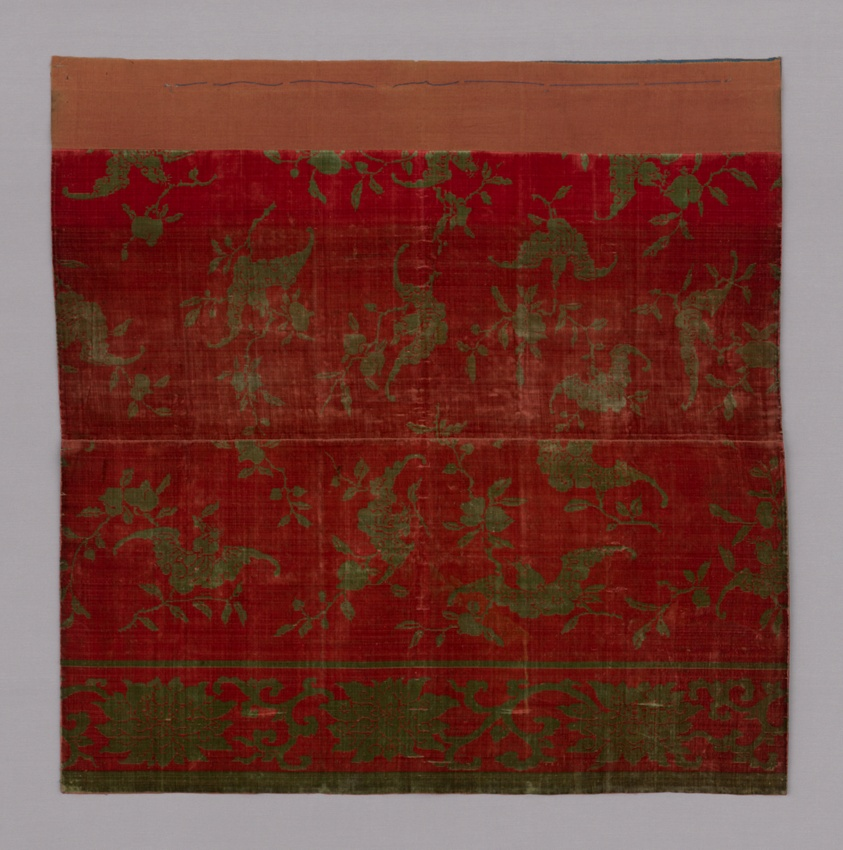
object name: Textile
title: Fragment (Furnishing Fabric)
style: qing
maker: China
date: Qing dynasty (1644–1911), 1750/1800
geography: China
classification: textile; weaving - velvet; weaving; furnishing textile